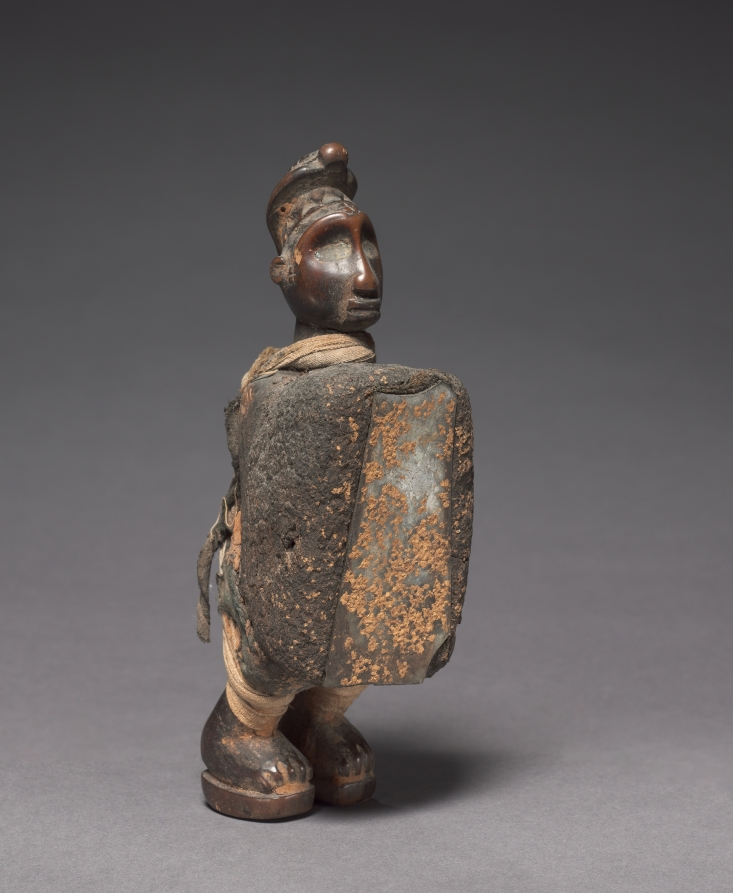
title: Male Figure (Nkisi)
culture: Africa, Central Africa, Democratic Republic of Congo (most likely), Cabinda, or Republic of the Congo, probably Yombe-style maker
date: late 1800s-early 1900s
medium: Wood, organic material (including resin), metalized glass, and cloth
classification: Sculpture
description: Nkisi is often associated with the word spirit, as these figures are believed to host a variety ancestral spirits. With an intact mirror-covered stomach cavity, this figure was not decommissioned before sale or disposal, deeming its particular powers sustained. The cloth knots and carvings suggest that it was used to bind agreements or oaths, and to reconcile social and cosmological contradictions.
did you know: The medicinal substances remain intact in this particular figure, which is rare, as most were decommissioned before museum acquisition.